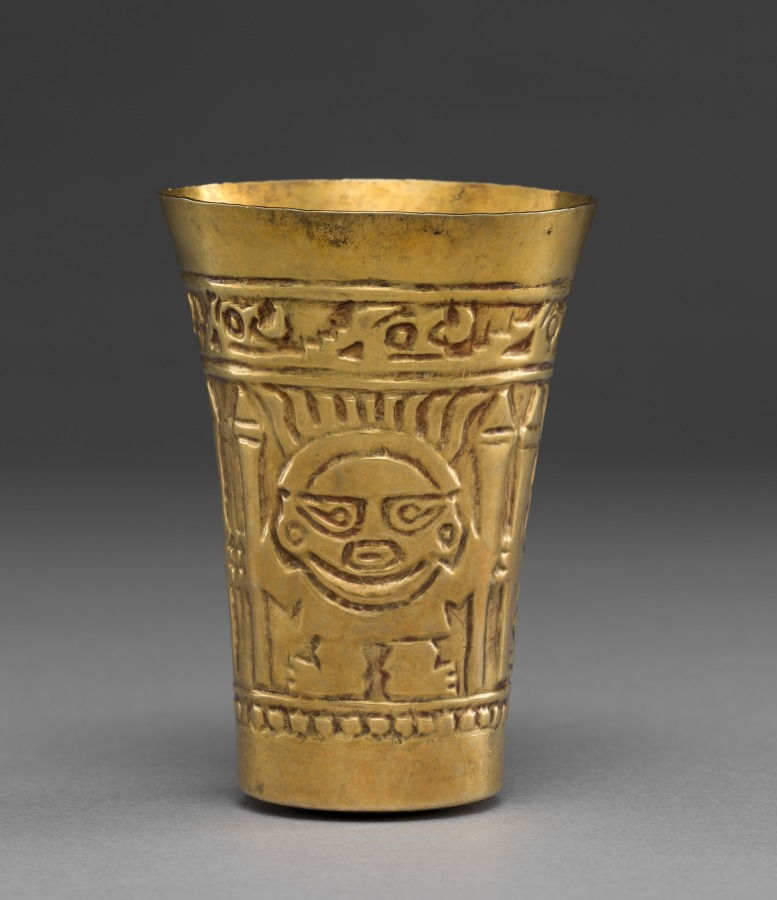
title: Beaker with Frontal Figures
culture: Central Andes (Peru), Lambayeque (Sicán) people, 10th century-12th century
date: 900–1100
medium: gold, hammered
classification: Metalwork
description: This beaker was created by an artist of the Lambayeque culture of Peru's north coast. It features a figure with comma-shaped eyes holding staffs, symbols of authority. If such beakers were used in life—that is, not created exclusively for the lavish tombs in which they have been found in quantities—they may have figured in feasting events that were central to late pre-Hispanic political, social, and religious life.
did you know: Gold beakers like this one were indicators of high status.